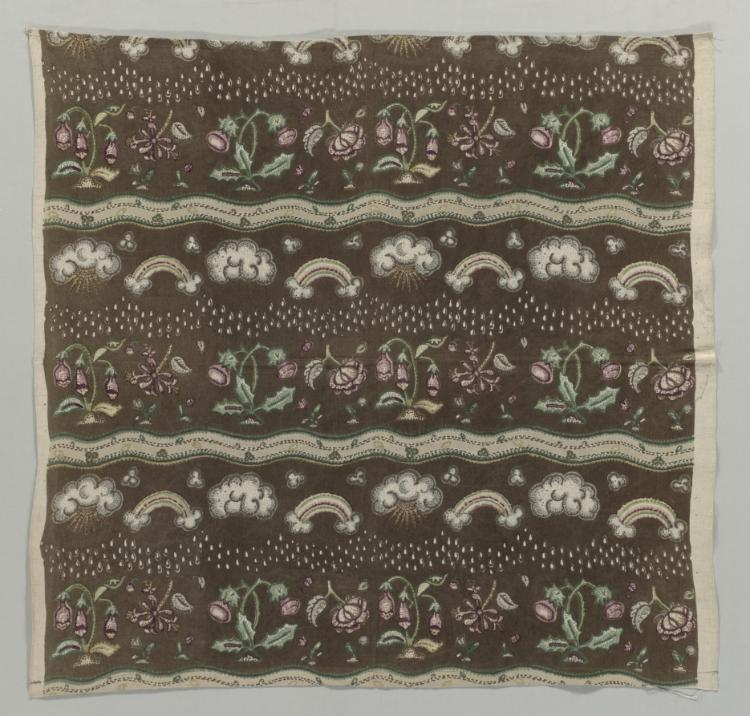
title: Textile Fragment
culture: England, 20th century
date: 20th century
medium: plain weave cotton, printed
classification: Textile